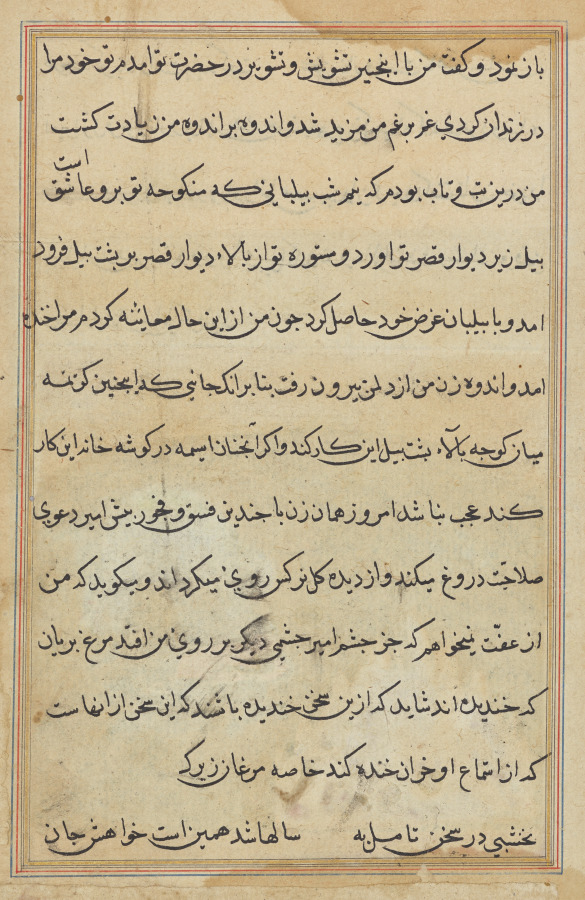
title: Page from Tales of a Parrot (Tuti-nama): text page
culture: Mughal India, court of Akbar (reigned 1556–1605)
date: c. 1560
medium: gum tempera, ink, and gold on paper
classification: Painting